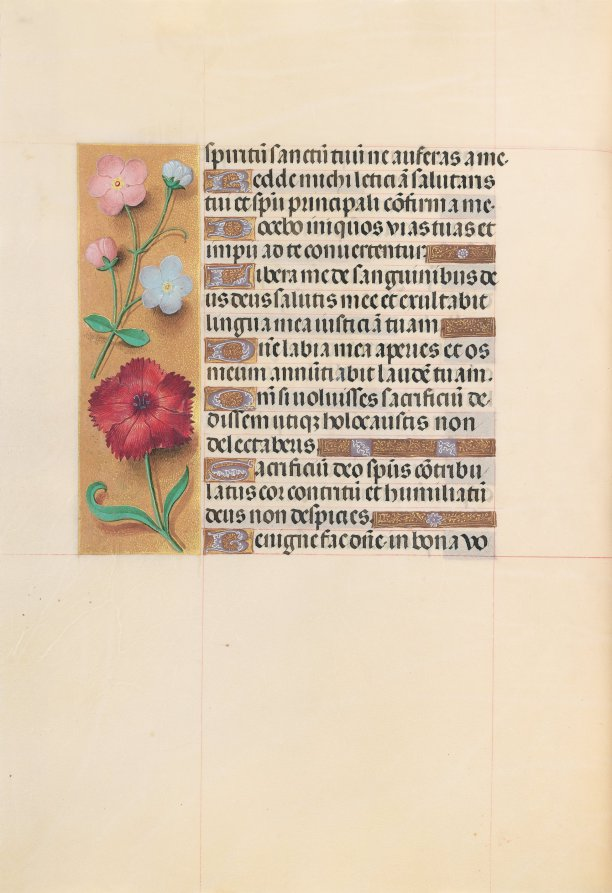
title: Hours of Queen Isabella the Catholic, Queen of Spain: Fol. 205v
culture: Flanders, Ghent and Bruges, late 15th century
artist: Master of the First Prayerbook of Maximillian (Flemish, c. 1444–1519)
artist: and Associates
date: c. 1500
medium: ink, tempera, and gold on vellum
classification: Bound Volume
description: This manuscript was illuminated by a circle of at least five highly organized manuscript painters active in the Flemish cities of Ghent and Bruges. The principal illuminator was Alexander Bening, who painted the majority of the book's miniatures. Manuscripts produced by this circle of artists are renowned for the decoration of their borders, which typically feature a rich variety of realistically-painted flowers, birds, and butterflies. This prayer book, called a book of hours, was intended not for a cleric, but for the private devotions of a lay person-in this case, Isabella the Catholic, Queen of Spain (1451-1504). Isabella's coat of arms embellishes the book's frontispiece. It is unlikely that the book was commissioned by the Queen herself; rather, she probably received it as a diplomatic gift from someone courting her patronage, perhaps Cardinal Francisco Jimenez de Cisneros. A Franciscan friar, Jimenez was dependent upon Isabella for his advancement, first to the post of Queen's confessor in 1492, and then to Archbishop of Toledo in 1495.